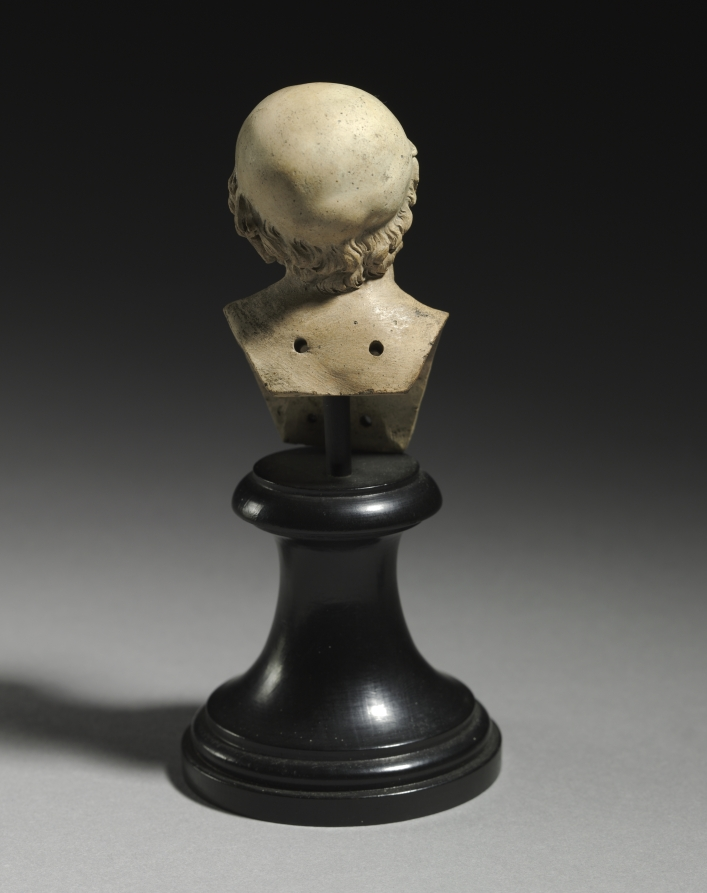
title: Head of a Man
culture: Italy, Naples(?), early 19th Century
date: c. 1800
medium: terracotta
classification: Sculpture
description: Each of these miniscule terracotta busts has allegedly been formed by hand, though the precision of the detailed features implies that they have been cast from a mold. Details such as the meticulously executed facial features and the thin, exact rows of hair on each figure suggest a manufactured method of creation. Furthermore, these figures lack any trace of fingerprints that handmade figures of this time typically bear. Small holes at the base of each bust suggest that the heads were once attached to bodies that may have been used as crèche figurines. The busts were created in Naples where large numbers of nativity scenes were produced around the turn of the nineteenth century. The similarity in size to archetypal terracotta crèche figurines as well as the vast production of nativities in Naples at this time suggest that these busts were created for a nativity scene.